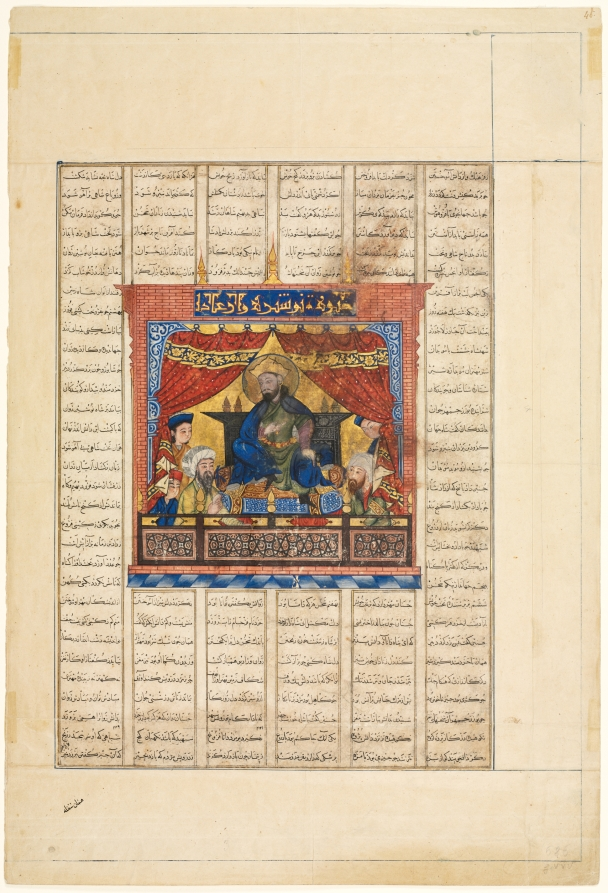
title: Portrait of Nushirwan the Just (verso) from a Shahnama (Book of Kings) of Firdausi (940–1019 or 1025)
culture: Iran, Tabriz, Ilkhanid period (1256-1353)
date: 1330–35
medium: opaque watercolor, ink, and gold on paper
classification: Manuscript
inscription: Script: Naskh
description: Mongol interest in the production of illustrated manuscripts eventually focused on Persian epic poetry. The Shahnama, a compilation of the epics and tales of Iran's legendary heroes, was a natural choice; the book included many subjects that suited Mongol taste, such as banquets, battles, hunting, and magical or fantastic events. Seated on the throne in the center of the painting is the Sasanian ruler of Iran, Khusraw I Anushirwan (531–579), descendant of Bahram Gur. Above the king's head an inscription reads, "Picture of Nushirwan the Just." The figure in the elaborate turban to the left of the king is probably the young Minister Buzurgmihr, famous for his wisdom and virtue. To celebrate the explanation of a troublesome dream by Buzurgmihr, Nushirwan held a series of seven banquets. The text around this painting describes the fifth banquet.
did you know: The symmetrical composition conveys the stability, balance, and restraint during the reign of King Nushirwan the Just.